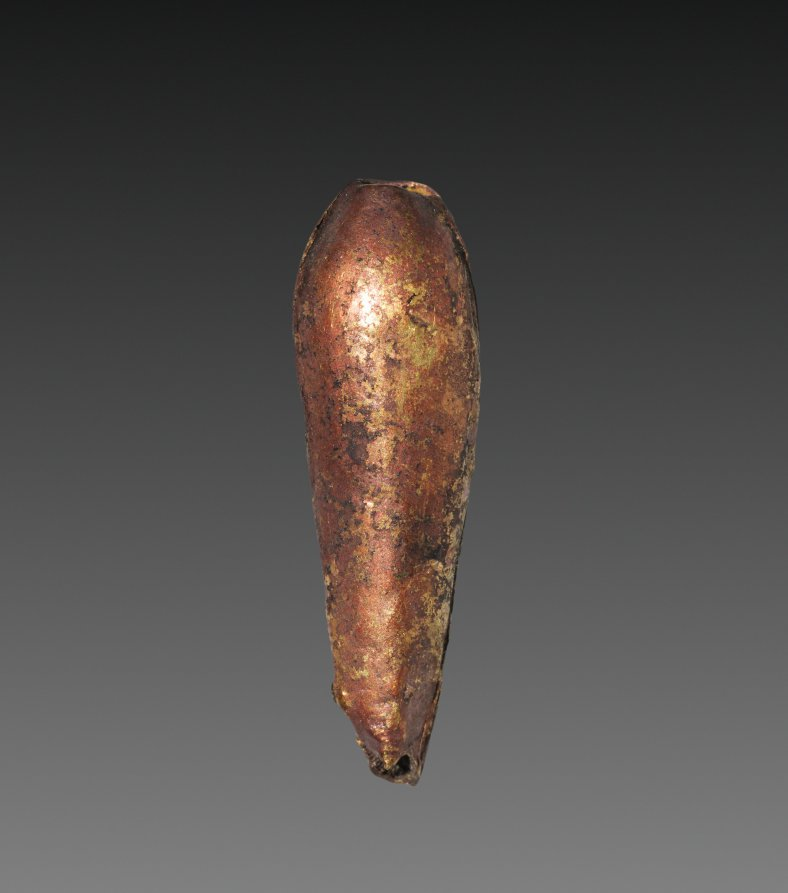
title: Teardrop-Shaped Bead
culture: Egypt, Middle Kingdom (2040–1648 BCE), Dynasty 12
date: 1980–1801 BCE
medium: gold over calcite gesso core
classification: Jewelry